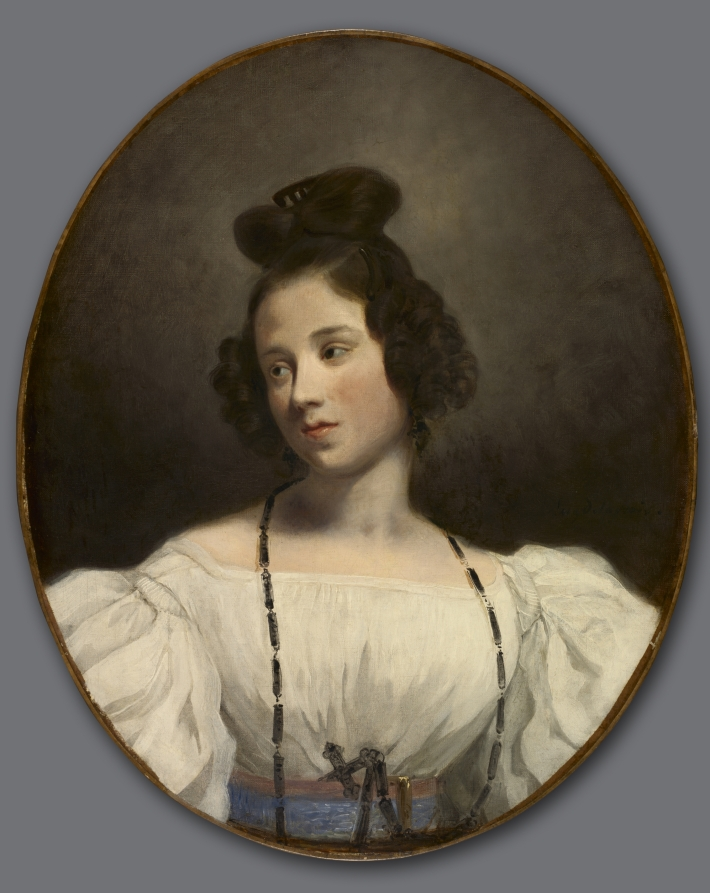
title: Mlle. Alexandrine-Julie de la Boutraye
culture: France, 19th century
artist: Eugène Delacroix (French, 1798–1863)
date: c. 1832–34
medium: oil on fabric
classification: Painting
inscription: Signed in center right: Eug Delacroix [infrared reveals a signature below the present one: Eug delacroix f. / 1832]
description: The sitter, who was born in 1820, posed for this portrait in 1834. She later became the wife of Count Raymond du Tillet.